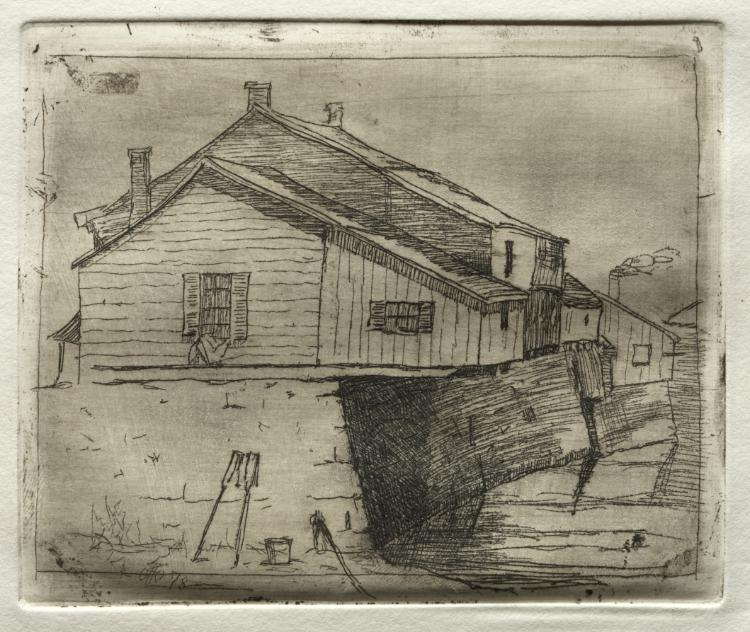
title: House Over Water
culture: America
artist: Otto H. Bacher (American, 1856–1909)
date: 1878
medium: etching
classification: Print